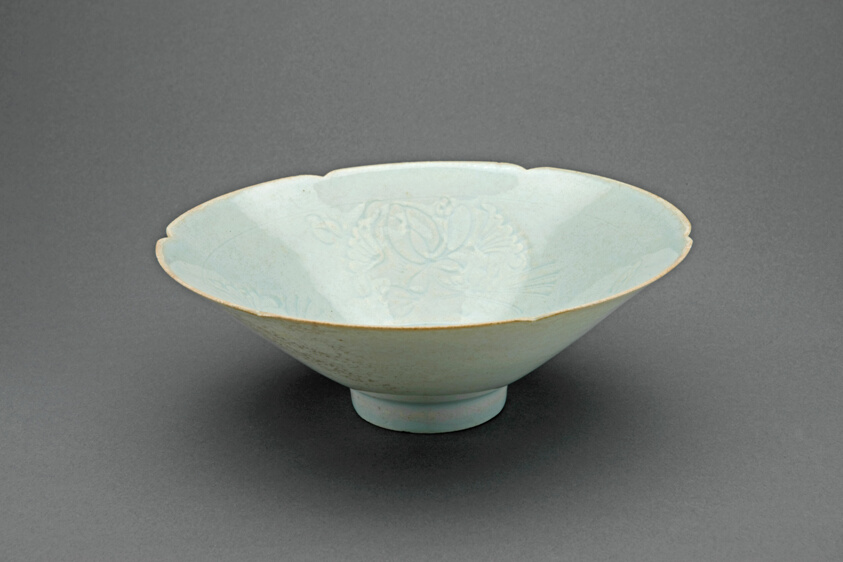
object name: Vessel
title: Lobed Bowl with Lotus Scrolls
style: Chinese (culture or style)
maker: China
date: Southern Song dynasty (1127–1279)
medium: Qingbai ware; porcelain with underglaze carved decoration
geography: China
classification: bowl; dish (vessel); vessel